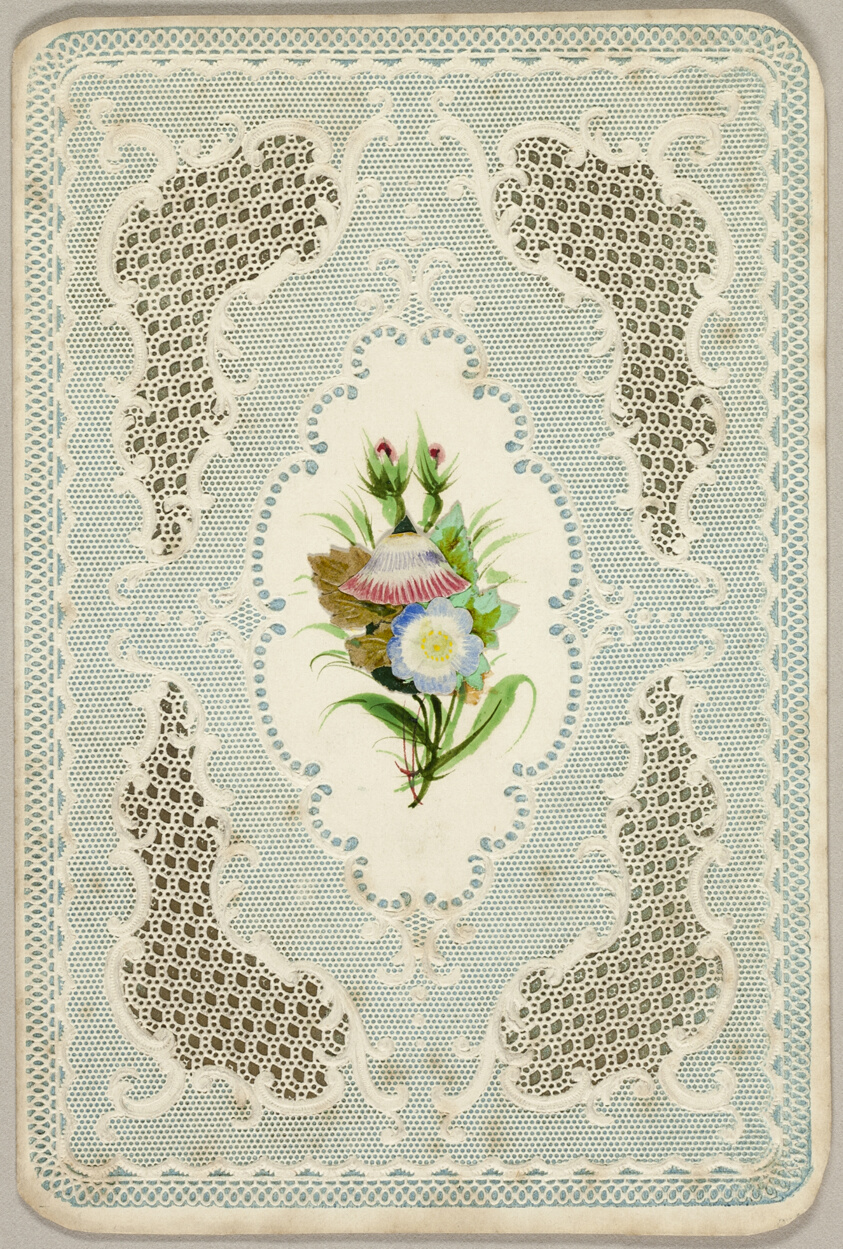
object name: Drawing and Watercolor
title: Untitled Valentine (Flowers)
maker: Unknown Artist; English, 19th century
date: 1840/50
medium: Collaged elements and watercolor on blue accented and embossed ivory wove paper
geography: England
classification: valentine; prints and drawing; paper